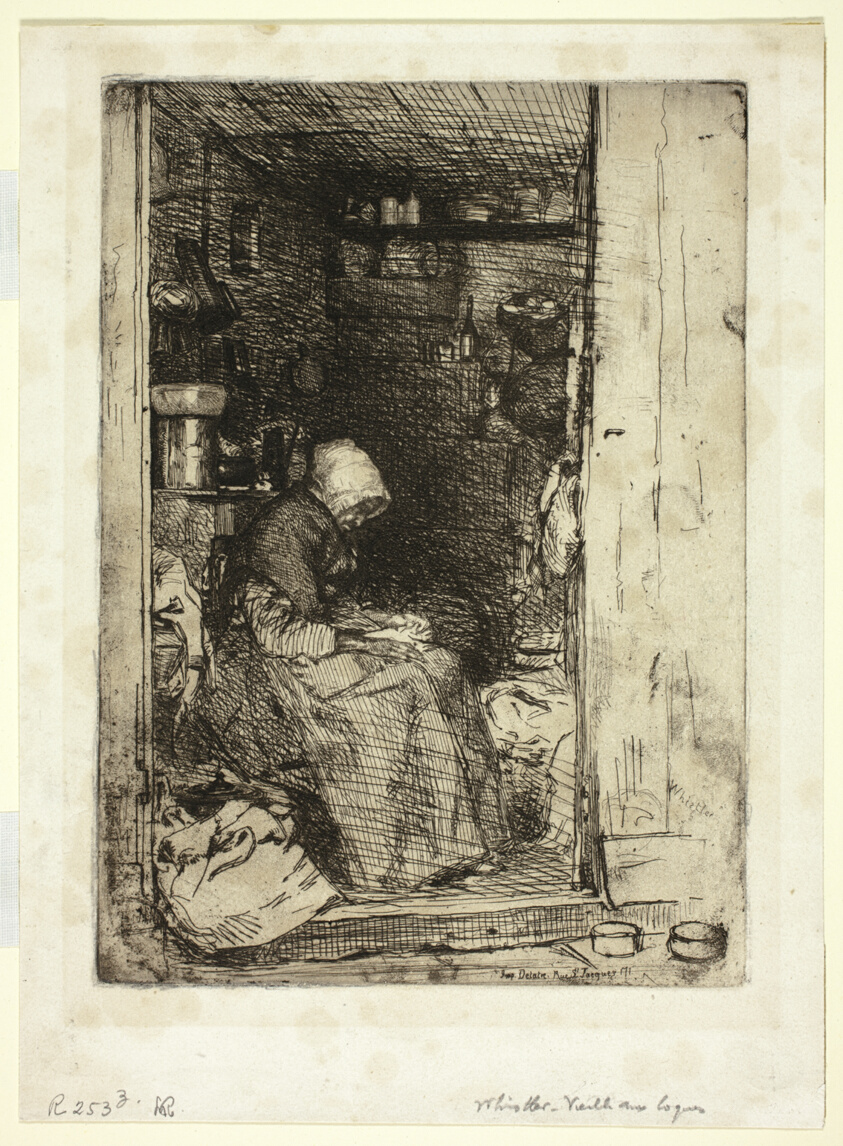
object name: Print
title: La Vieille aux Loques (The Old Woman with Rags)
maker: James McNeill Whistler (American, 1834-1903)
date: 1858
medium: Etching and drypoint with foul biting in black ink on off-white China paper laid down on off-white wove paper (chine collé)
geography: United States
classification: etching; foul biting; print; prints and drawing; paper; drypoint